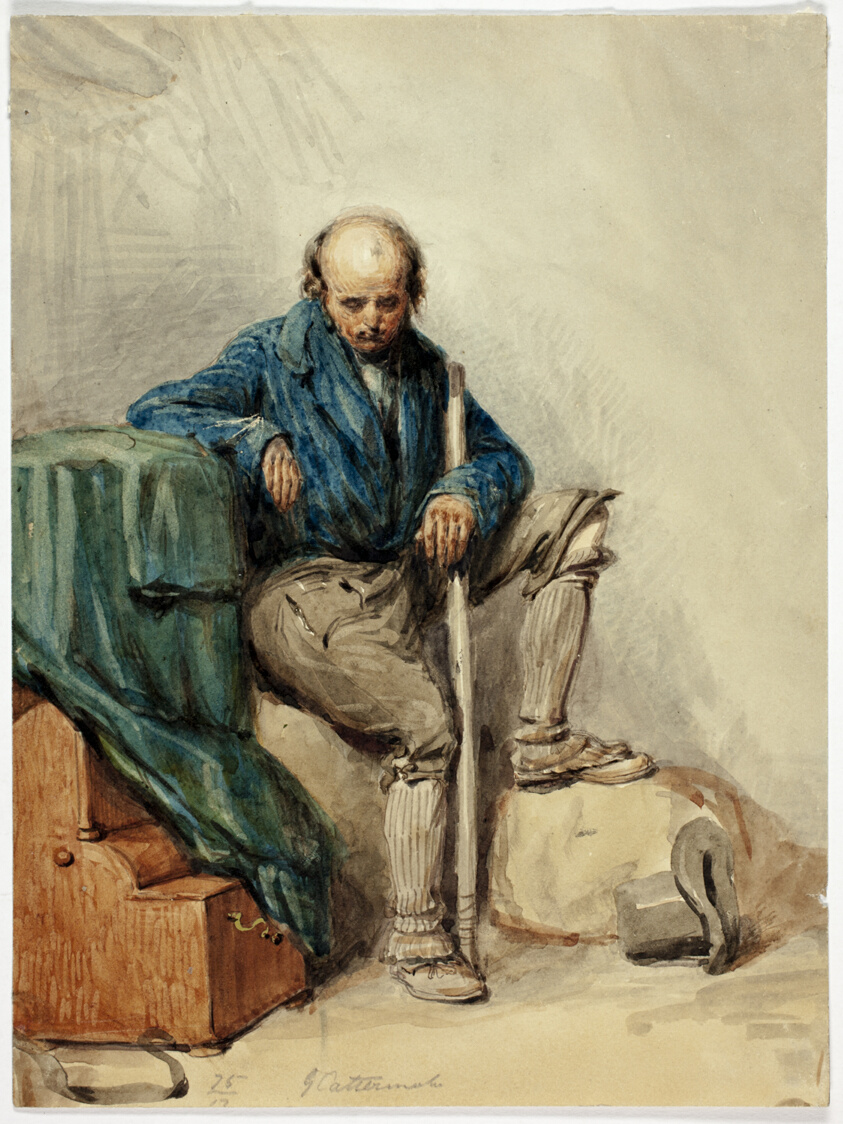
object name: Drawing and Watercolor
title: Bald Man Seated on Belongings (recto); Lady in a Yellow Gown (verso)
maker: Attributed to George Cattermole; English, 1800-1868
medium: Watercolor over traces of graphite (recto and verso), on ivory wove paper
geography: England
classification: watercolor; drawings (visual works); prints and drawing